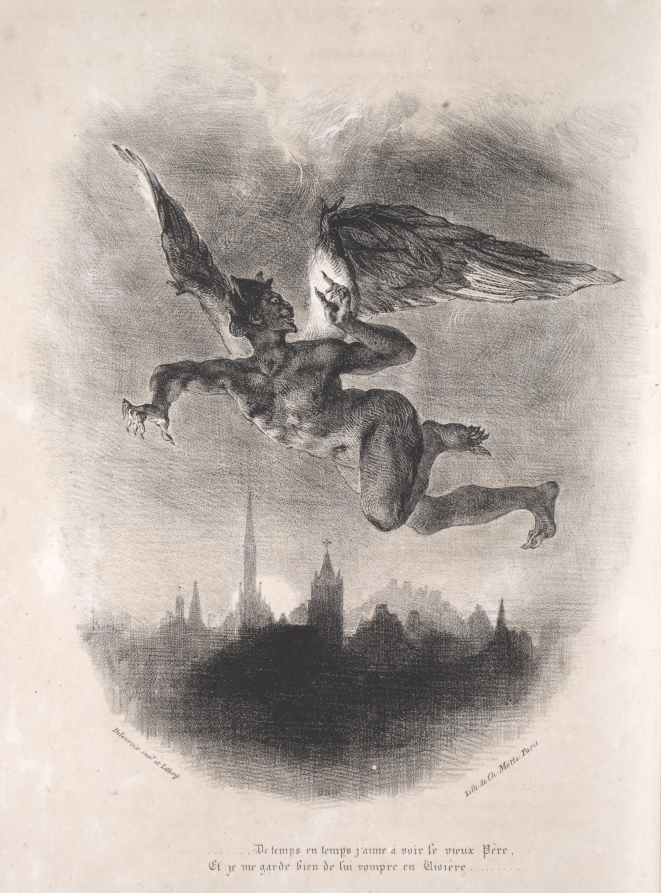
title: Illustrations for Faust: Méphistophélés in the air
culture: France, 19th century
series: Faust: Tragédie de M. de Goethe, translated into French by Albert Stapfer.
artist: Eugène Delacroix (French, 1798–1863)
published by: Chez Ch. Motte, Éditeur, distributed by Chez Sautelet, Libraire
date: 1828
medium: lithograph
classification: Print